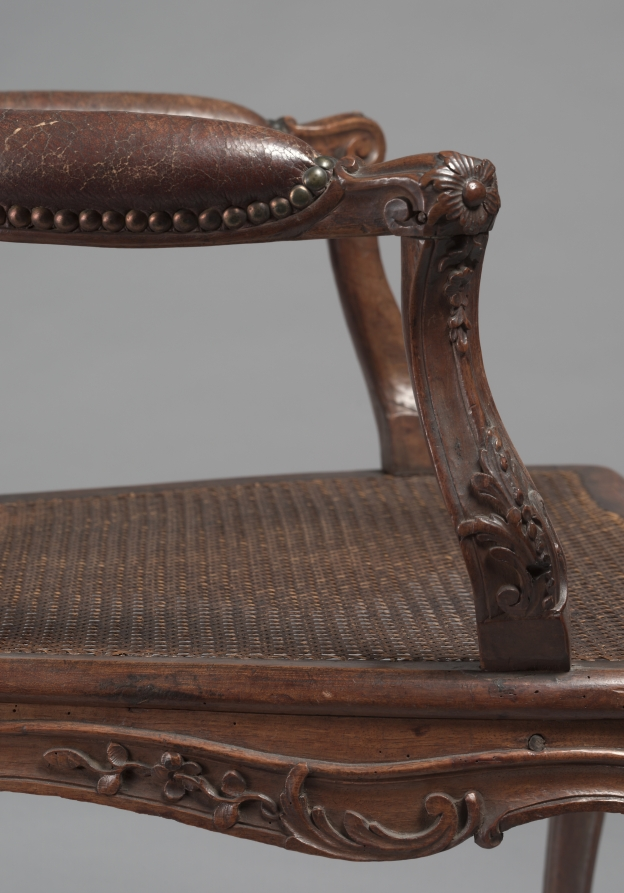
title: Armchair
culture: France, 18th century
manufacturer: René Cresson (French, c. 1705–c. 1749)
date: c.1740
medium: carved wood, cane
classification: Furniture and woodwork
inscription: signed underneath on strip across back: "CRESSON LAINE" (the trademark for René Cresson).